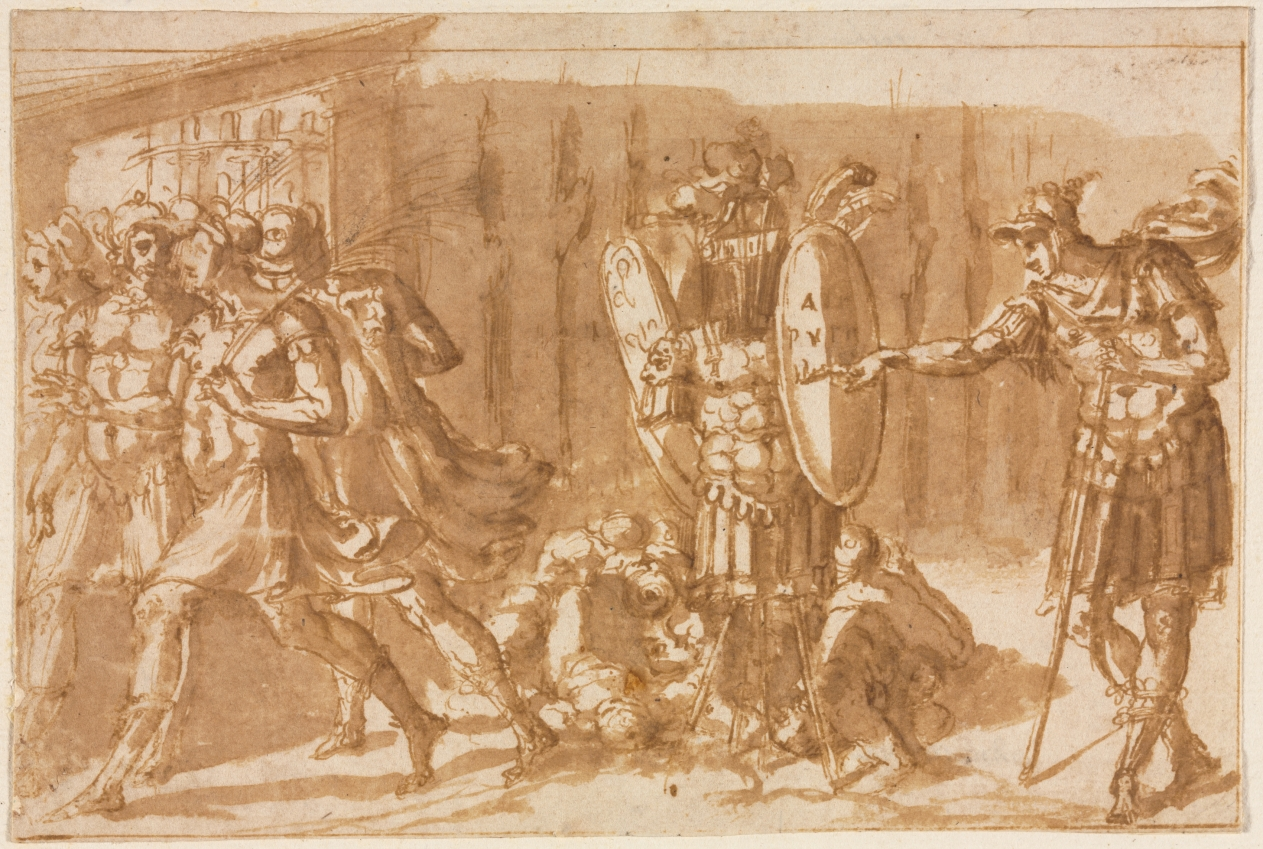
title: Victorious Soldiers with Trophy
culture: Italy, 16th century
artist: Pellegrino Tibaldi (Italian, 1527–1596)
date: 1550s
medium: pen and brown ink and brush and brown wash; framing lines in brown ink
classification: Drawing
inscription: VERSO (of secondary support?), upper left, in ink: [illegible] ; lower left, in ink: [illegible] del Vagh ; RECTO OF TERTIARY SUPPORT, upper right, in graphite: 14 ; VERSO OF TERTIARY SUPPORT, across center, in graphite: Pierin dell Vago